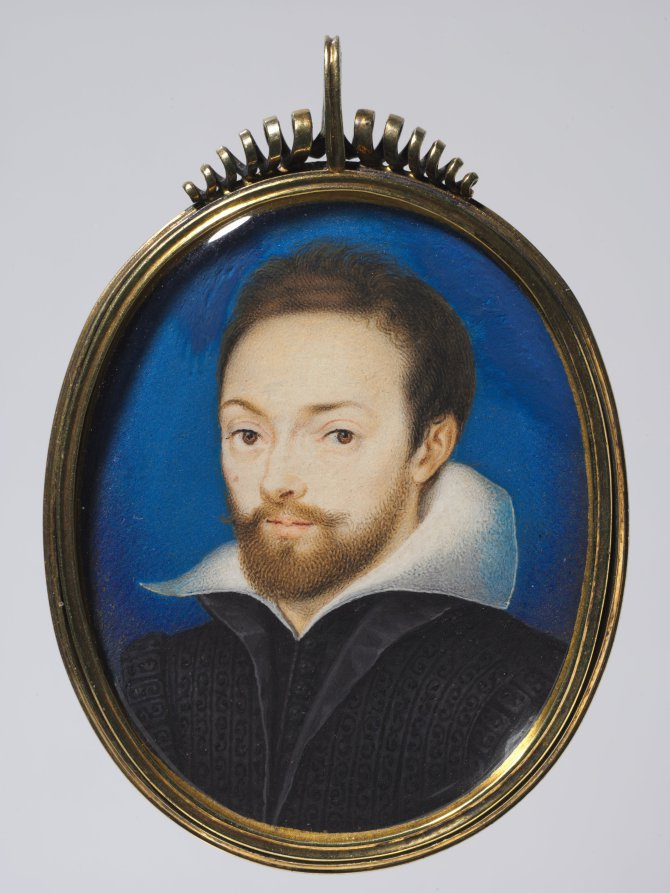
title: Portrait of a Man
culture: England, late 16th-early 17th century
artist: circle of Isaac Oliver (French, c. 1565–1617)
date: c. 1615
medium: watercolor on card in a later silver gilt frame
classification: Portrait Miniature